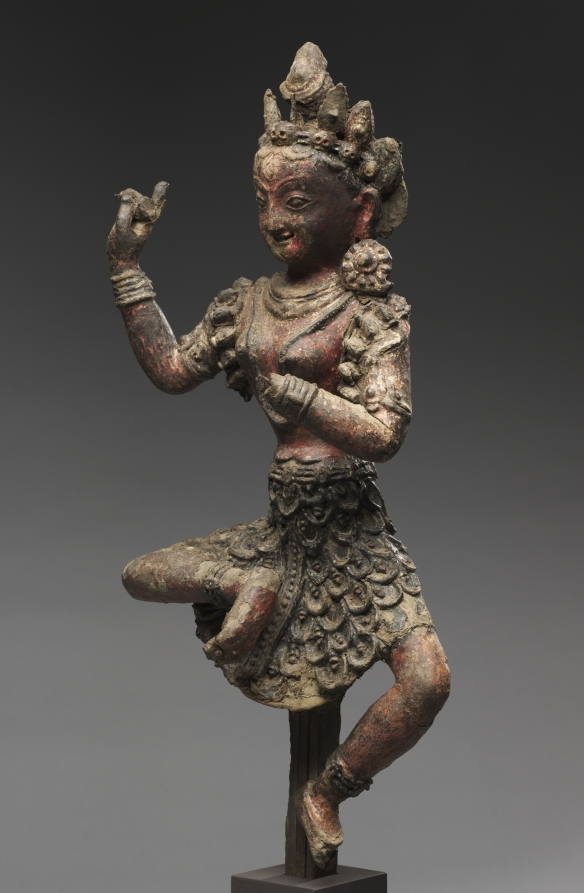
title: Goddess Vajravarahi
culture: Nepal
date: c. 1040–c. 1310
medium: unbaked clay and pigment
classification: Sculpture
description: This powerful red goddess dances vigorously and raises one hand that would have held a flaying knife, while the other once held a skull cup. Her bone skirt and garland of freshly severed heads complement the skulls that adorn her crown. Her eyes bulge, her brow furrows, and she bares her teeth. These attributes communicate her power to assist her followers in overcoming passions, ignorance, and fear. This is one of the earliest surviving images made of unbaked clay, using an iron armature and rope strings to support the ornament.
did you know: The wooden post is an original and would have been set into a sculpted corpse.